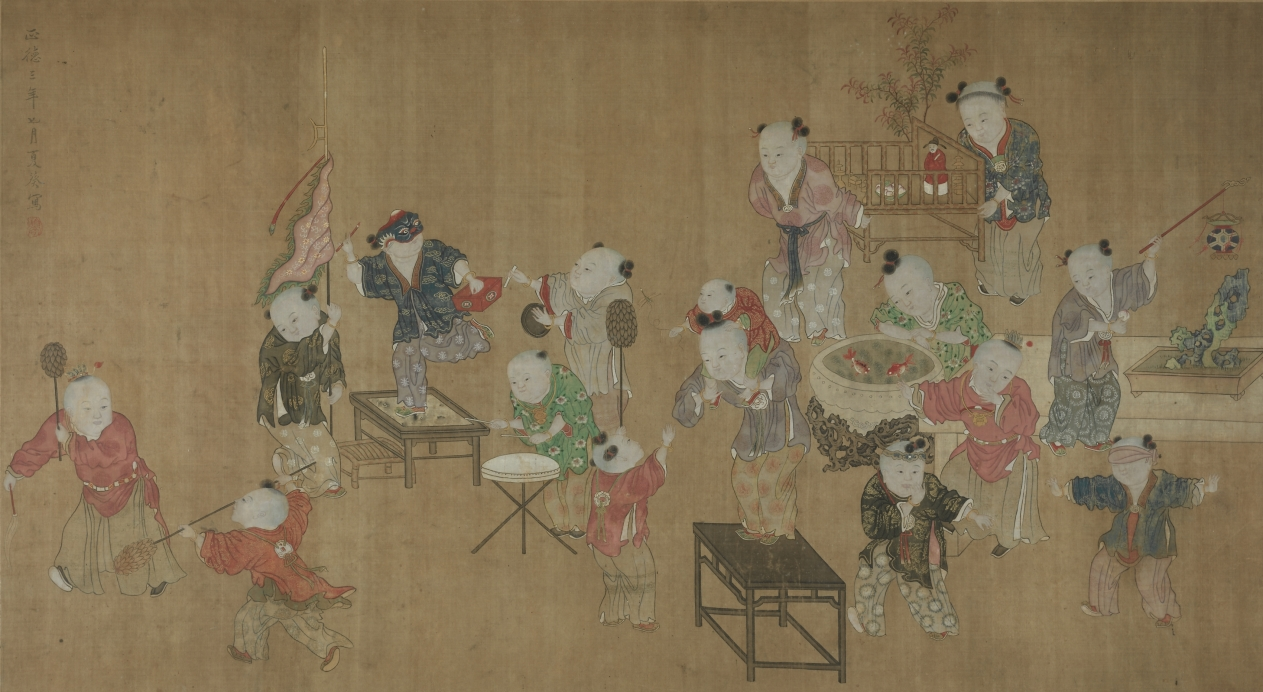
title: Children at Play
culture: China, Ming dynasty (1368–1644)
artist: Xia Kui (Chinese, active c. 1405–1445)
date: 1508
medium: hanging scroll; ink and color on silk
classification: Painting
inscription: 正德三年七月夏葵寫 [Zhengde san nian qi yue Xia Kui xie]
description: Sixteen children engage in scholarly, religious, and military activities, representing the popular “one hundred boys” theme expressing the wish for abundant, successful male offspring. Such paintings conveying auspicious wishes were often displayed during the New Year festival season. Two older boys wear small crowns with red tassels. Another child with a mask holds a brush in one hand, a rice measure in the other. He stands on a low table imitating Kuixing, the God of Examinations and servant to the God of Literature.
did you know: In the foreground on the right are three boys playing a kind of blind man’s bluff.